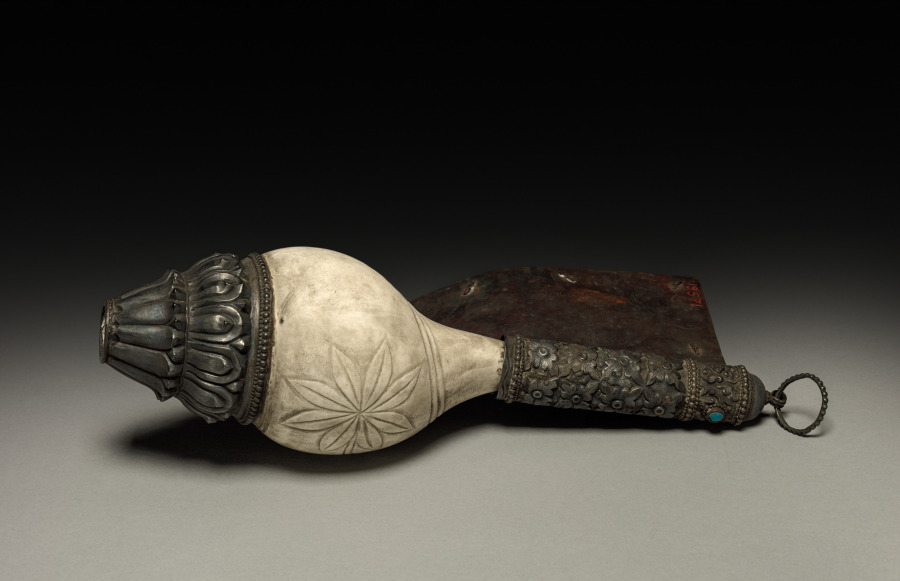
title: Conch Shell Set in Silver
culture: Tibet, 19th century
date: 1800s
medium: shell and silver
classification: Metalwork